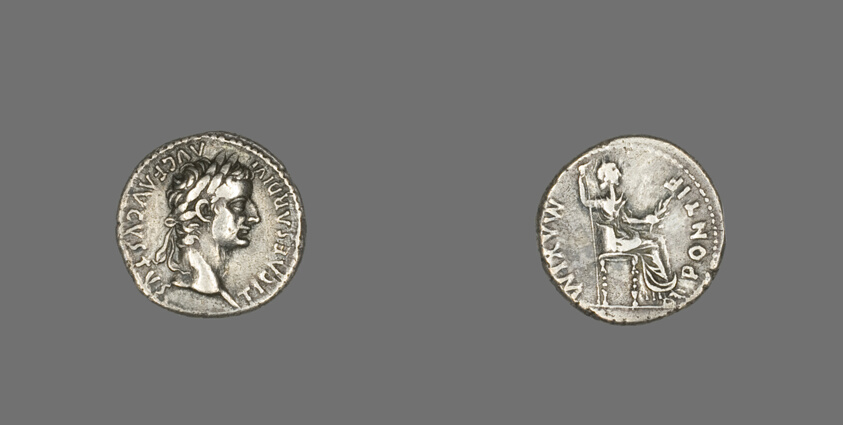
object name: Coin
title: Denarius (Coin) Portraying Emperor Tiberius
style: imperial (roman), ancient, roman (ancient, style or period)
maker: Roman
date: 14-37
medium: Silver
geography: Roman Empire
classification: coin; ancient art; struck